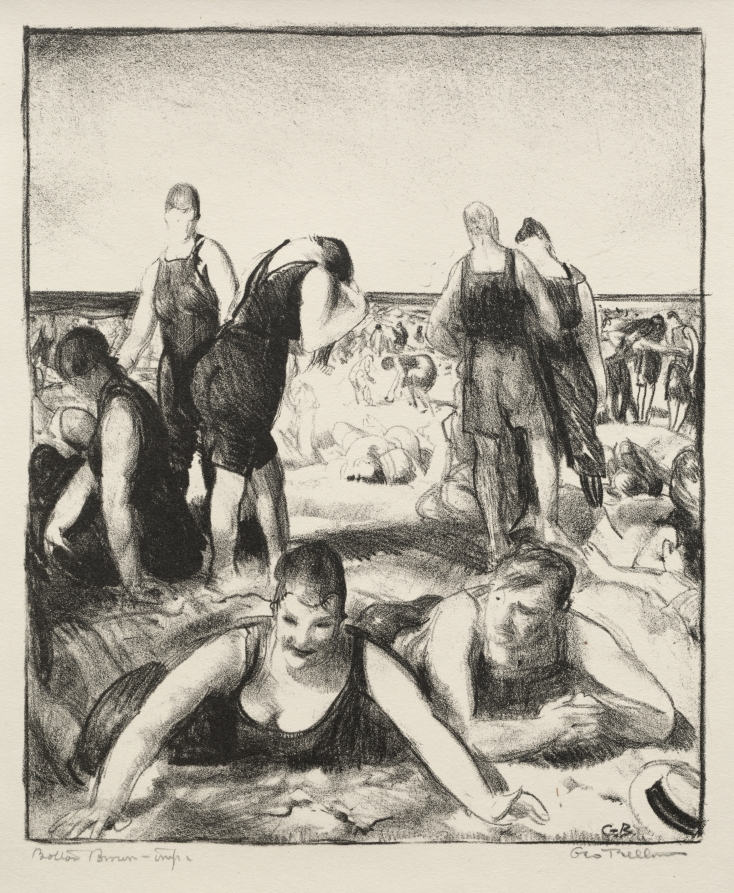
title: Bathing Beach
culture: America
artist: George Bellows (American, 1882–1925)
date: 1921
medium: lithograph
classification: Print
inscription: In graphite, lower left, recto: "Sea Shore"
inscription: In graphite, lower right, recto: "Geo Bellows"